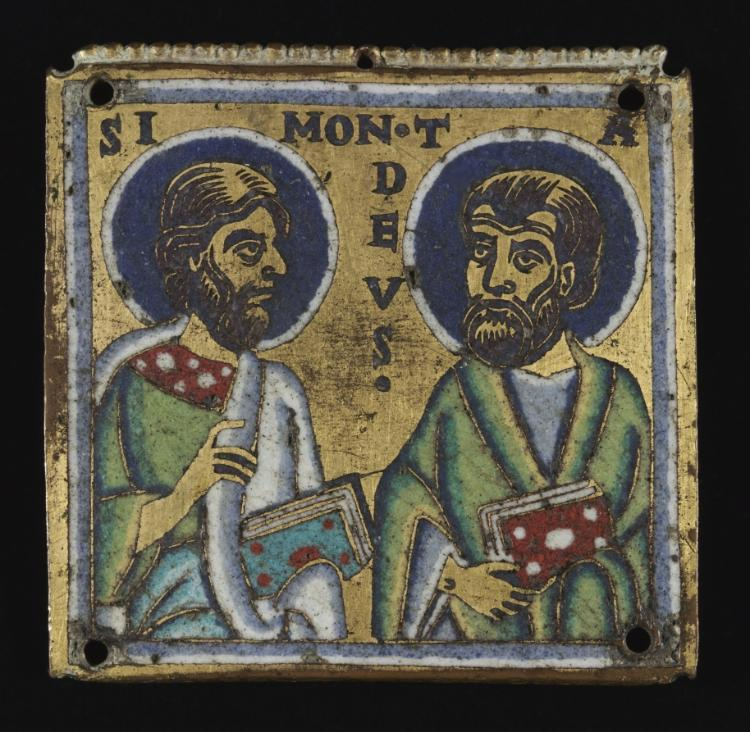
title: Plaque: Simon and Thaddaeus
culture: Mosan, Valley of the Meuse, Romanesque period, 12th century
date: c. 1160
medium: gilded copper, champlevé enamel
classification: Enamel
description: It is likely this pair of enamel plaques depicting the apostles Simon with Thaddeus and Thomas with Matthew once formed part of the decoration of a portable altar, a reliquary triptych, or some other kind of liturgical object.